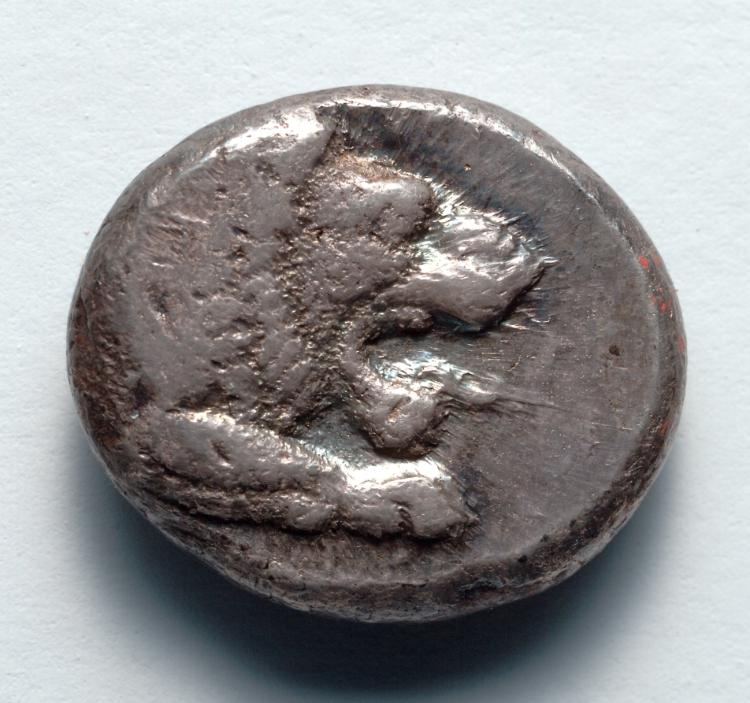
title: Drachm: Forepart of Lion, r. (obverse)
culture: Greek, minted at Knidos (Karia)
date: 465–449 BCE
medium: silver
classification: Coins